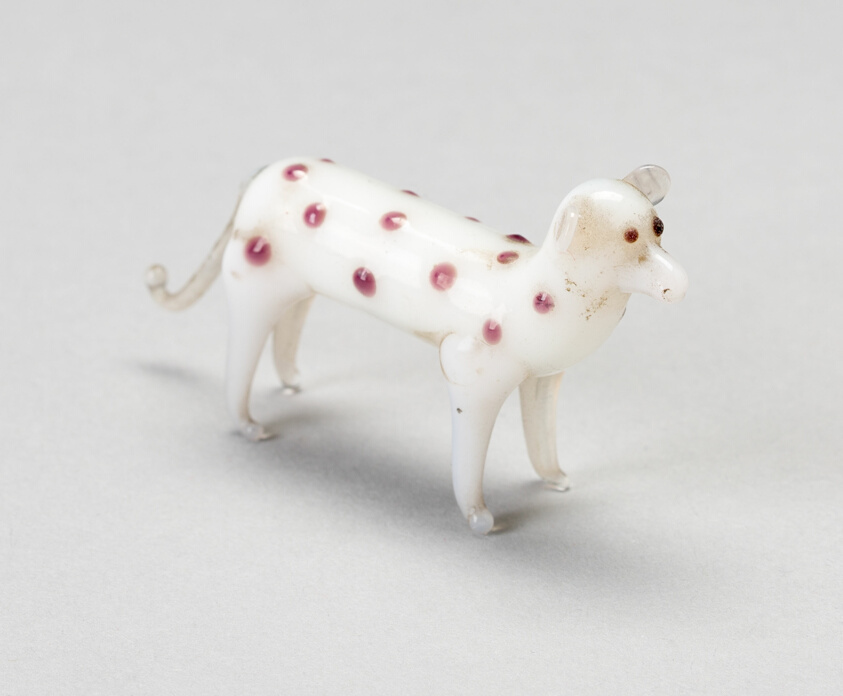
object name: Glass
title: Dog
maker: Nevers, France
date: 18th century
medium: Glass; lampwork (verre de Nevers), metal armature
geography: France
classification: decorative object/ornament; lampwork; glass; european decorative arts